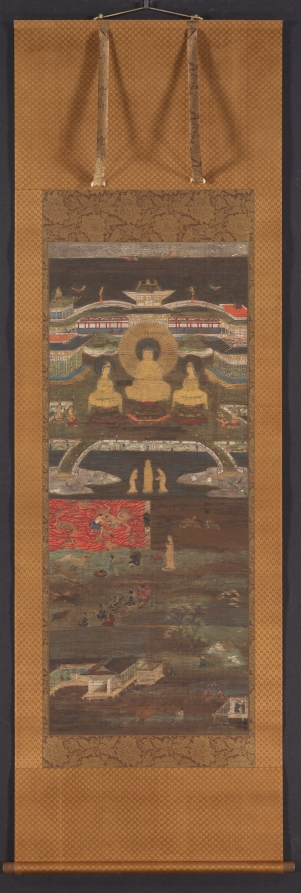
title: The White Path Between Two Rivers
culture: Japan, Kamakura period (1185–1333)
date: 1200s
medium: hanging scroll; ink, color, gold, silver, and cut gold on silk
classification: Painting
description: This painting is a visual presentation of a teaching ascribed to the Chinese Buddhist monk Shandao (善導) (613–681). It describes a challenging journey to the land of the Buddha Amida along a narrow path between a river of fire and a river of water. The story is about escaping the six paths of reincarnation—the heavens and hells, as well as the realms of humans, animals, hungry ghosts, and fierce beings. The Buddha Amida appears at the top in his Pure Land, or Western Paradise.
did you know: The Six Realms of Transmigration are the: heavenly realm, hells, human realm, animal realm, realm of hungry ghosts, and realm of fierce beings.